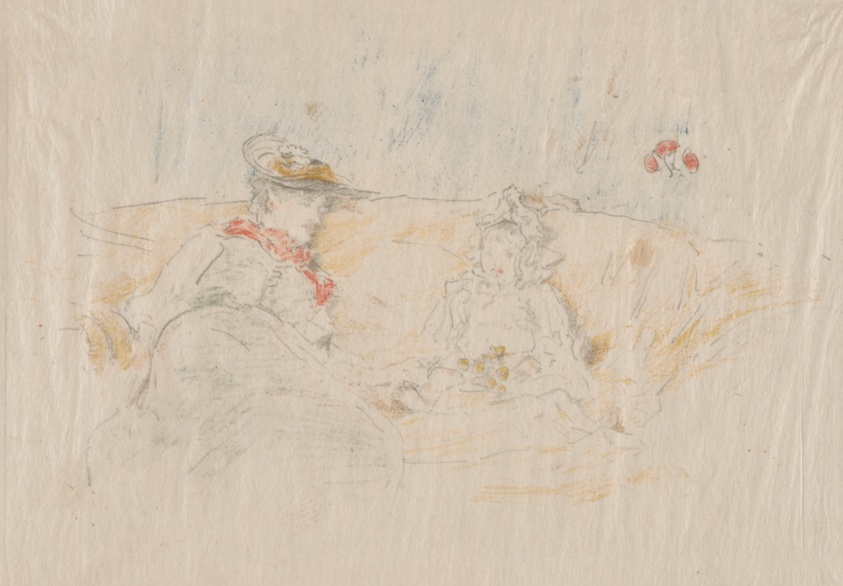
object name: Print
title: Lady and Child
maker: James McNeill Whistler (American, 1834-1903)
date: 1892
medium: Transfer lithograph from five stones, in gray (keystone), blue, green, brown, yellow, orange, red, and ochre on cream Japanese gampi paper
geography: United States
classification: transfer lithograph; lithograph; print; prints and drawing; paper